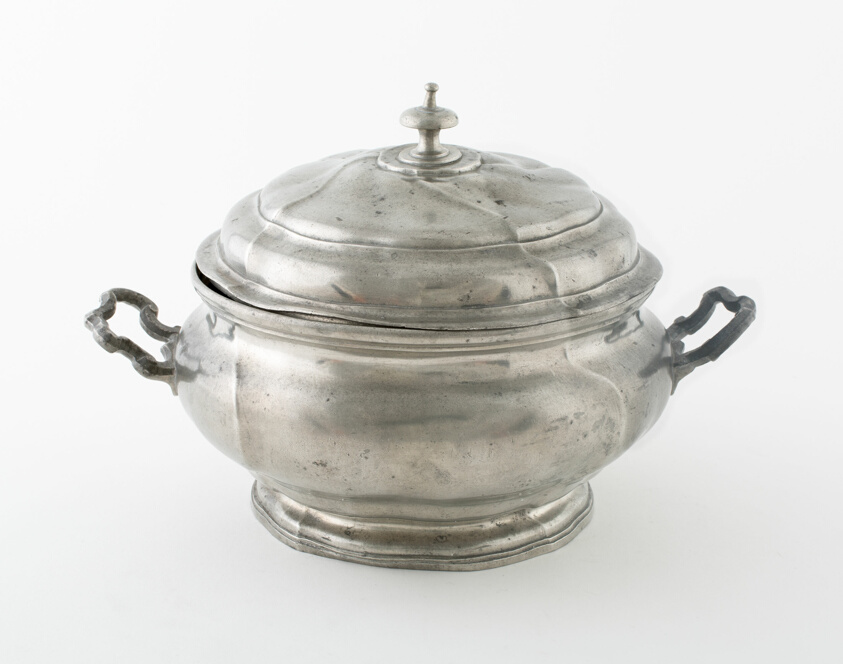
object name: Metalwork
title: Tureen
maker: Johann Wilhelm Stucker; German, 18th century; Schlaggenwald, Germany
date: 19th century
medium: Pewter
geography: Germany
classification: dish (vessel); pewter; metalwork; european decorative arts